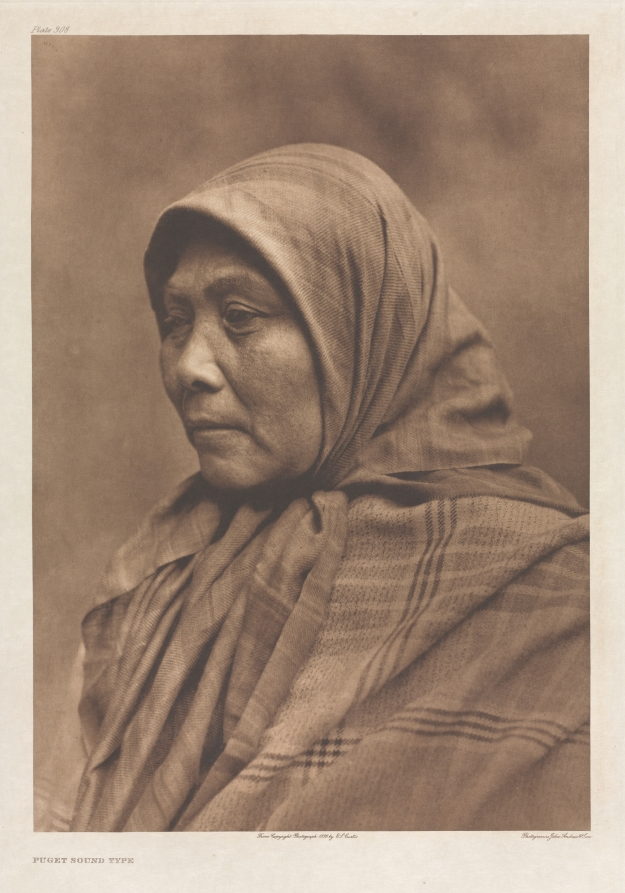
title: Portfolio IX, Plate 308: Puget Sound Type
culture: America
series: The North American Indian: being a series of Portfolios picturing and describing the Indians of the United States, the Dominion of Canada, and Alaska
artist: Edward S. Curtis (American, 1868–1952)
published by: The University Press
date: 1899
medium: photogravure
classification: Portfolio